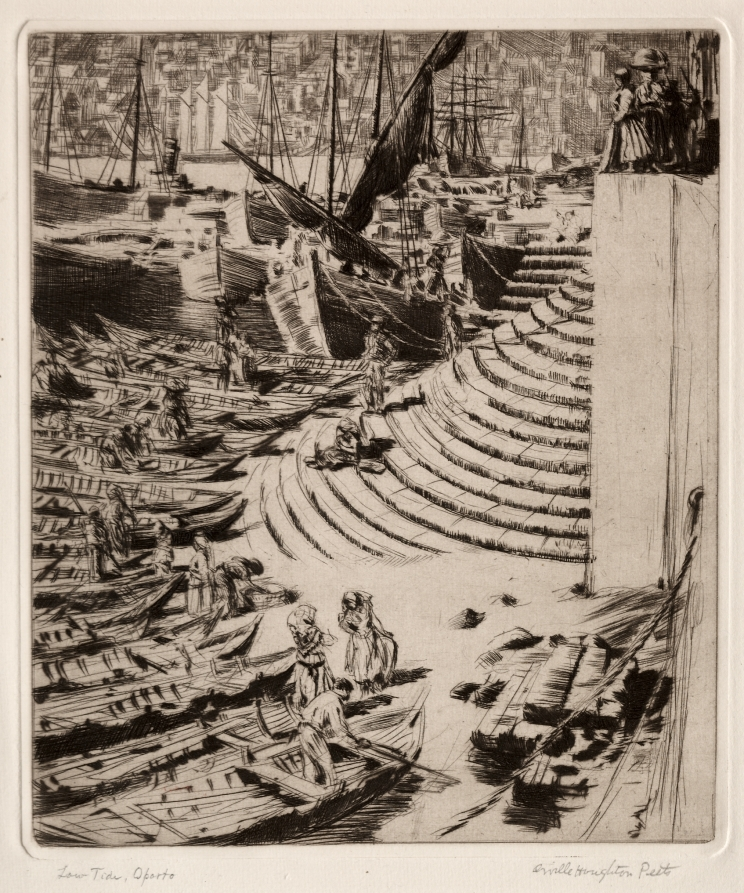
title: Low Tide, Oporto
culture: America, Ohio, Cleveland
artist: Orville Houghton Peets (American, 1884–1968)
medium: etching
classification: Print